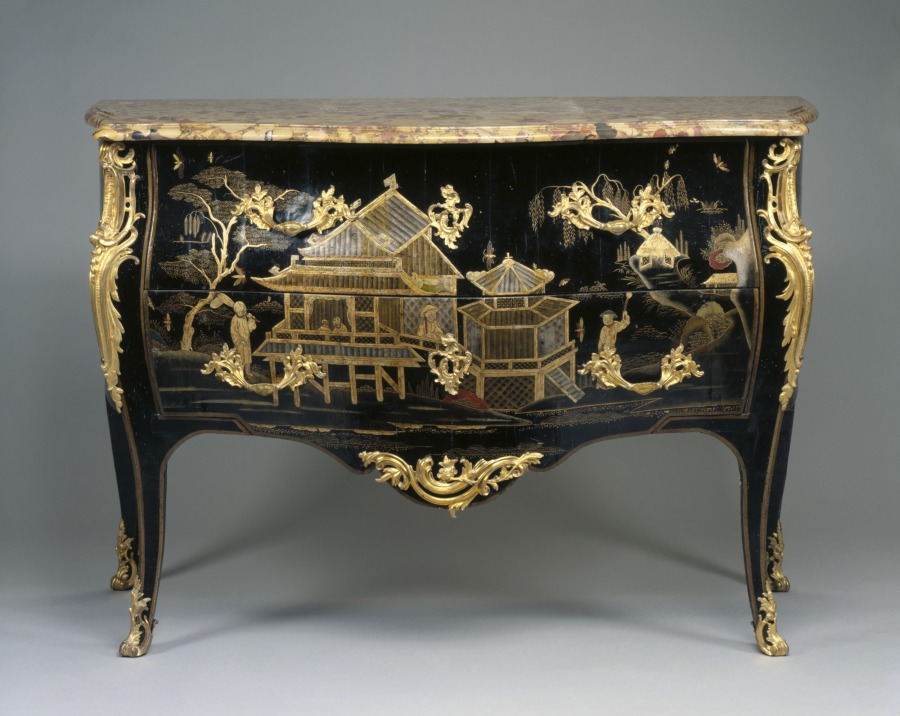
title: Chest of Drawers (Commode)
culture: France, 18th century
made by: probably by Adrien Faizelot Delorme (French)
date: c. 1750– 1765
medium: oak, black lacquer with raised chinoiserie decoration, gilt metal mounts, marble top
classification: Furniture and woodwork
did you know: Although this chest of drawers was made in France, its decoration is an imitation of Chinese lacquer, which reflects European perceptions of East Asia at the time.